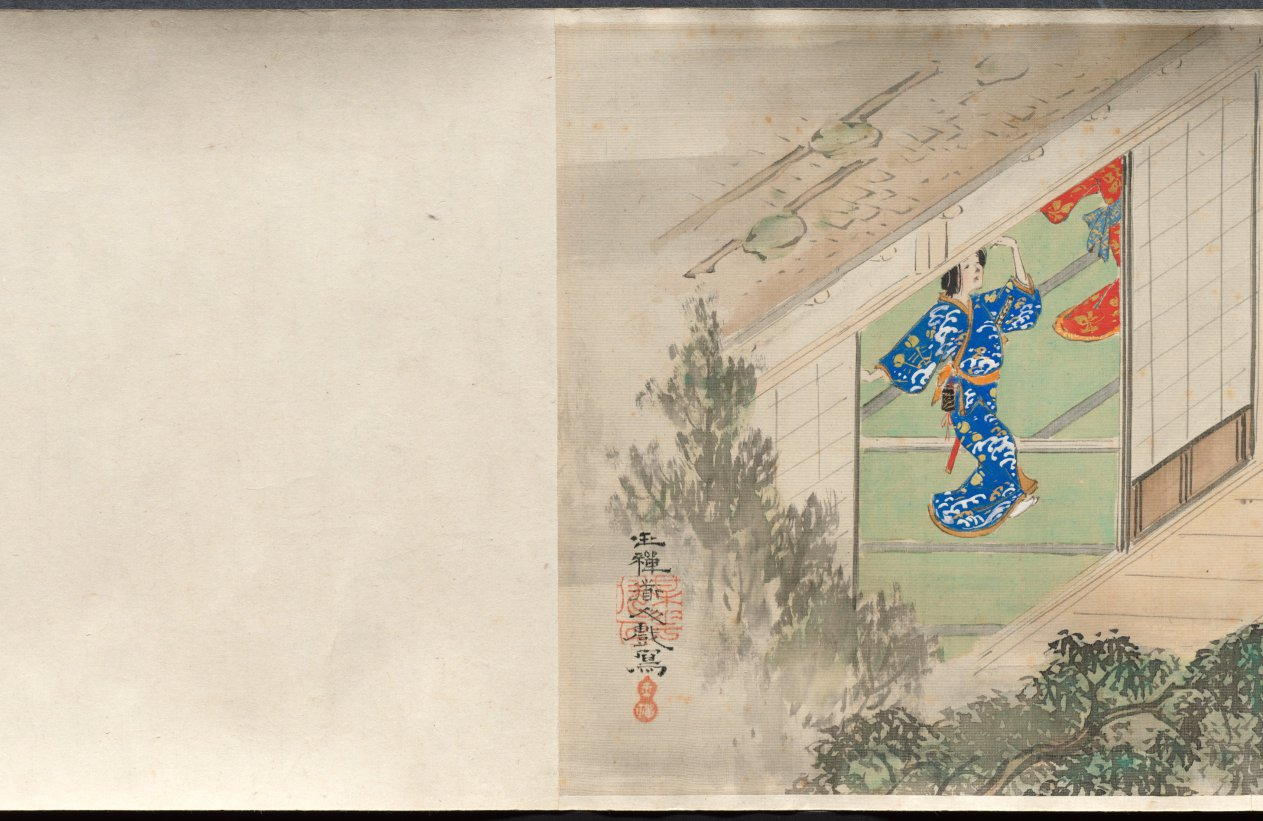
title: The Shadow Dancers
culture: Japan, Edo period (1615–1868)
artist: Yamamoto Baiitsu (Japanese, 1783–1856)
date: 1800s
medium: handscroll, ink and color on silk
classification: Painting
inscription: artist's signature and two seals at end of painting.